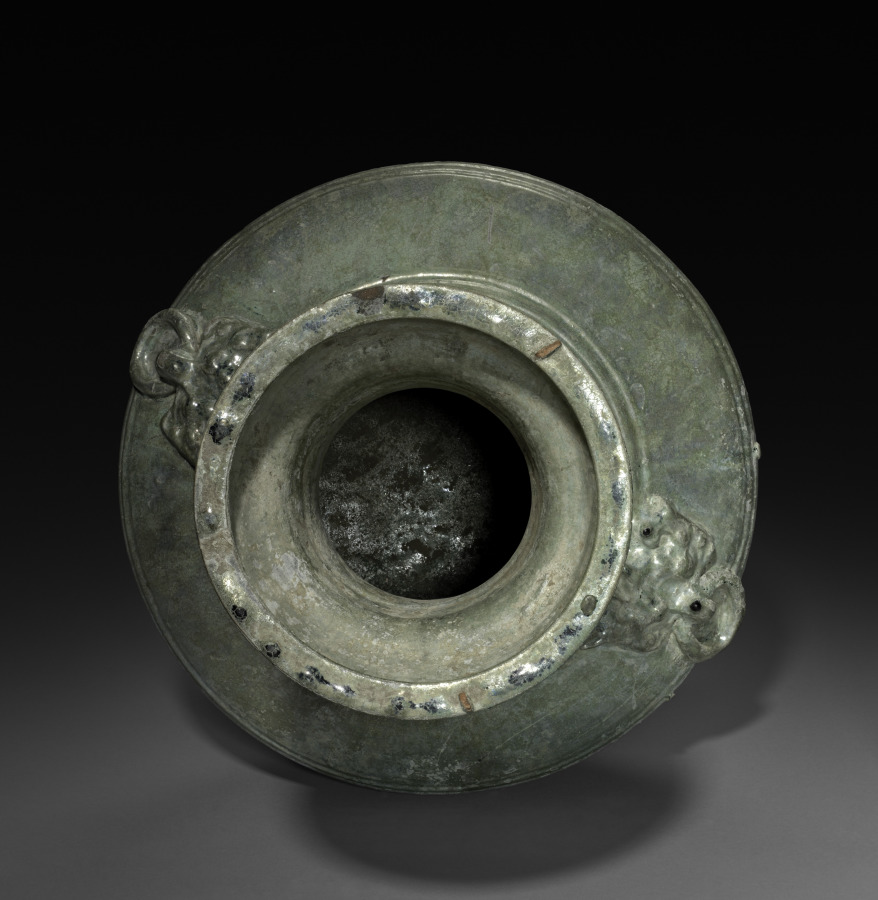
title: Covered Jar (Hu)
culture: China, Eastern Han dynasty (25–220 CE)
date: 25–220 CE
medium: earthenware with lead glaze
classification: Ceramic